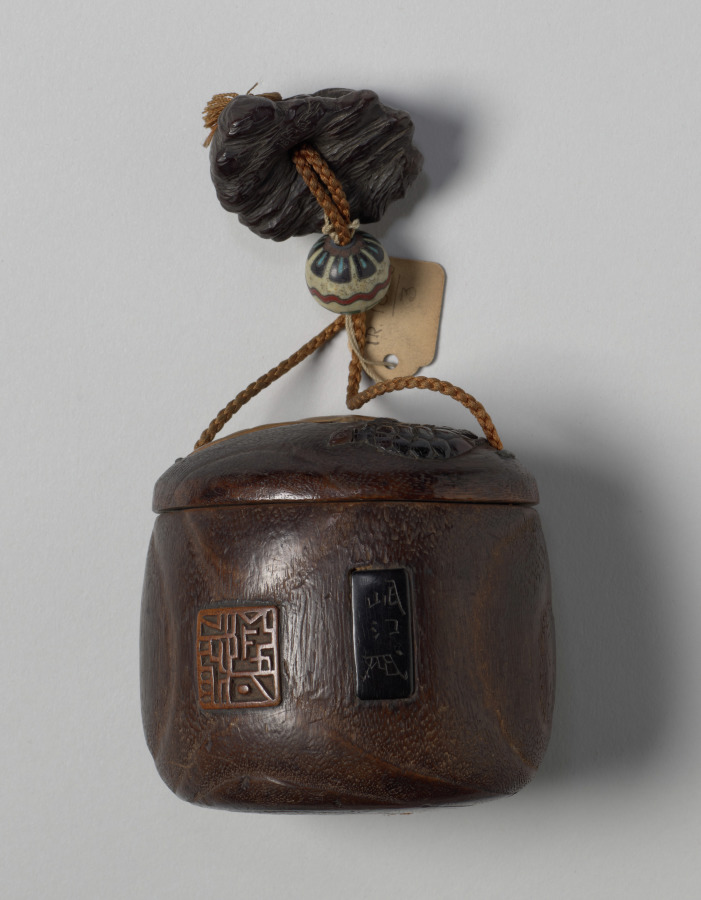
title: Tobacco Box with Turtles in Lotus and Grasses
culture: Japan, Edo period (1615–1868)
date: c. 1760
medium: Box: wood with color and metal, shell, and stone inlay; toggle (ojime): ceramic; netsuke: wood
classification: Miscellaneous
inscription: Box signed: 岷江 花押; sealed: 岷江; netsuke signed: 栗斎